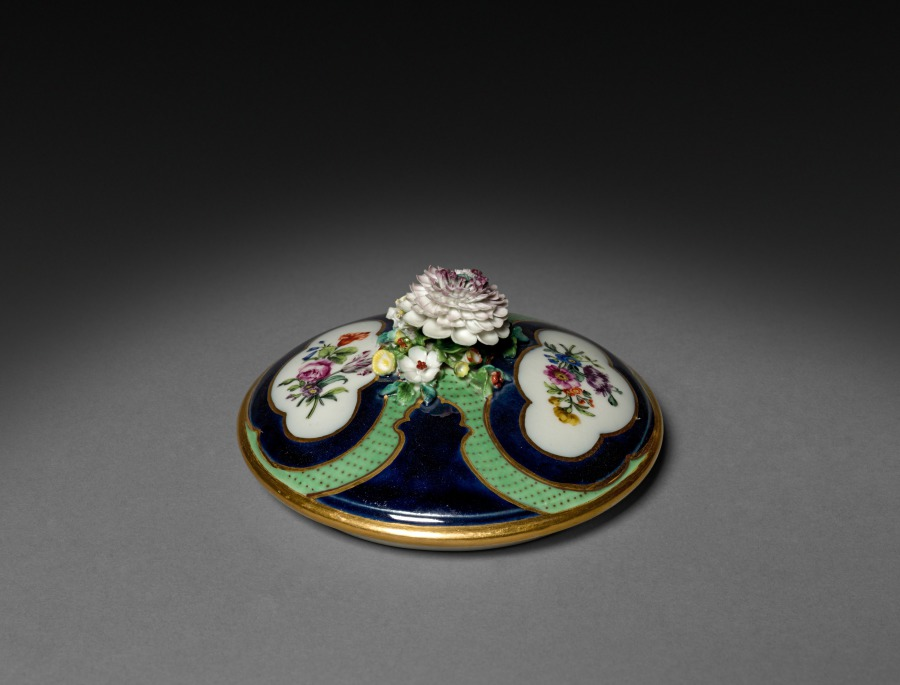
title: Cover for a Cup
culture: Austria, Vienna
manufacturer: Du Paquier Porcelain Manufactory (Austrian, active 1719–1864)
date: c. 1780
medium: porcelain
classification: Ceramic